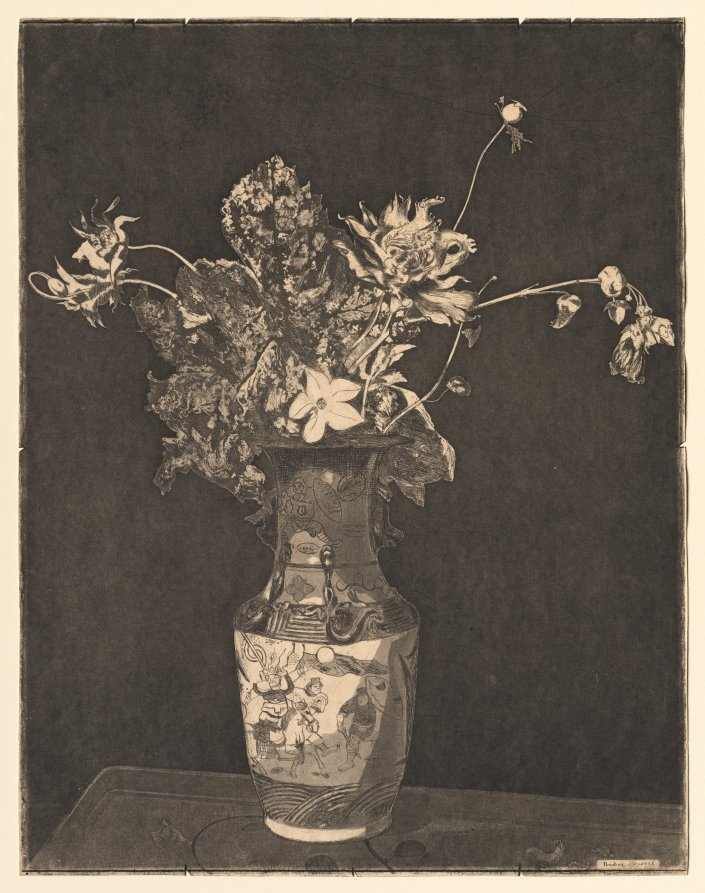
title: The Agony of Flowers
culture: France, 19th century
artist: Theodore Roussel (French, 1847–1926)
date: 1890–1895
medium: softground etching and aquatint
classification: Print